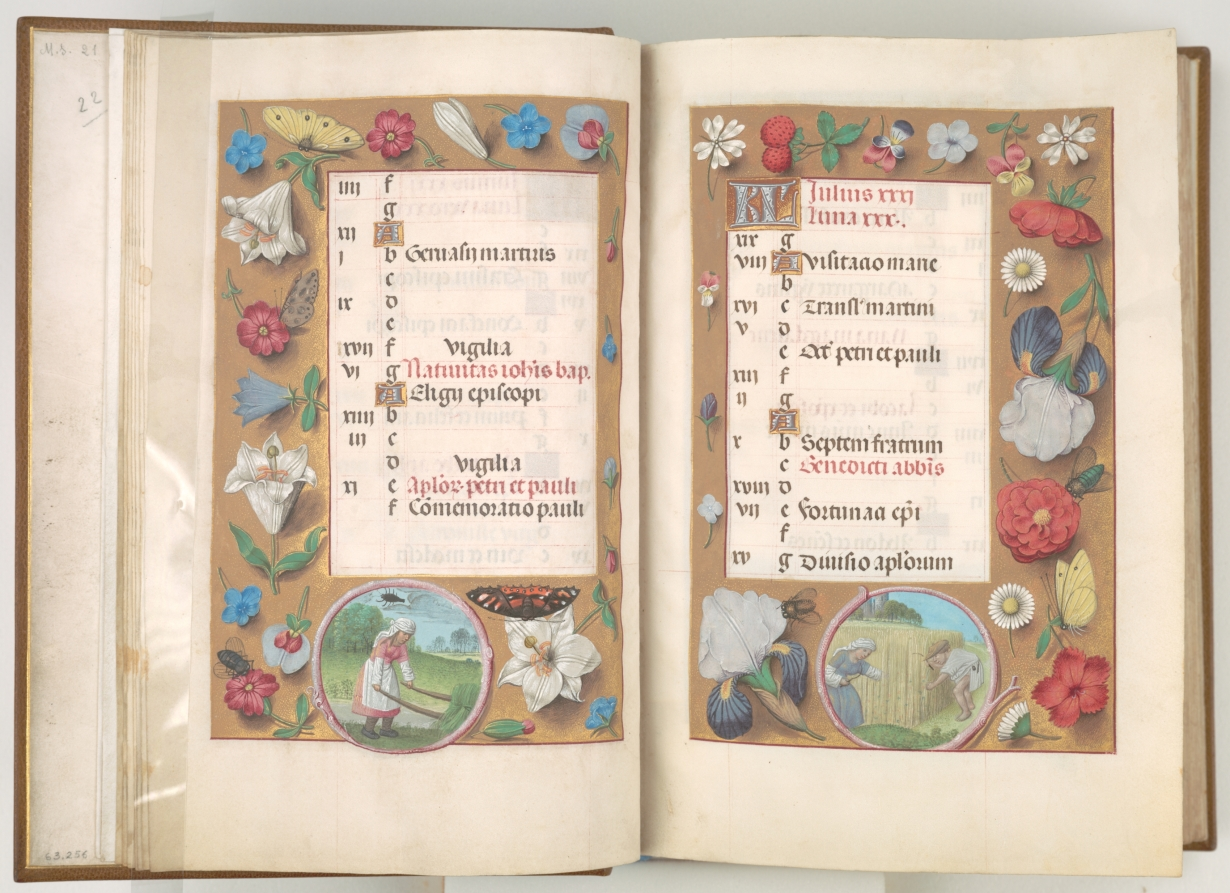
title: Hours of Queen Isabella the Catholic, Queen of Spain: Fol. 7v, June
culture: Flanders, Ghent and Bruges, late 15th century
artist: Master of the First Prayerbook of Maximillian (Flemish, c. 1444–1519)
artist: and Associates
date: c. 1500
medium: ink, tempera, and gold on vellum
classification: Bound Volume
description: A great lover of Flemish art, Queen Isabella treasured her many devotional books. This deluxe manuscript was created for her private devotions by highly organized and distinctly talented manuscript painters active in Ghent and Bruges. The Ghent-Bruges school represents the culmination of Flemish book painting, whose main features were the use of rich colors, illusionistic effects, a love of landscape, and a strong sense of visual narrative. Manuscripts produced by this circle of artists are renowned for their border decoration featuring a rich variety of realistically painted flowers, scrolling acanthus leaves, birds, and butterflies.